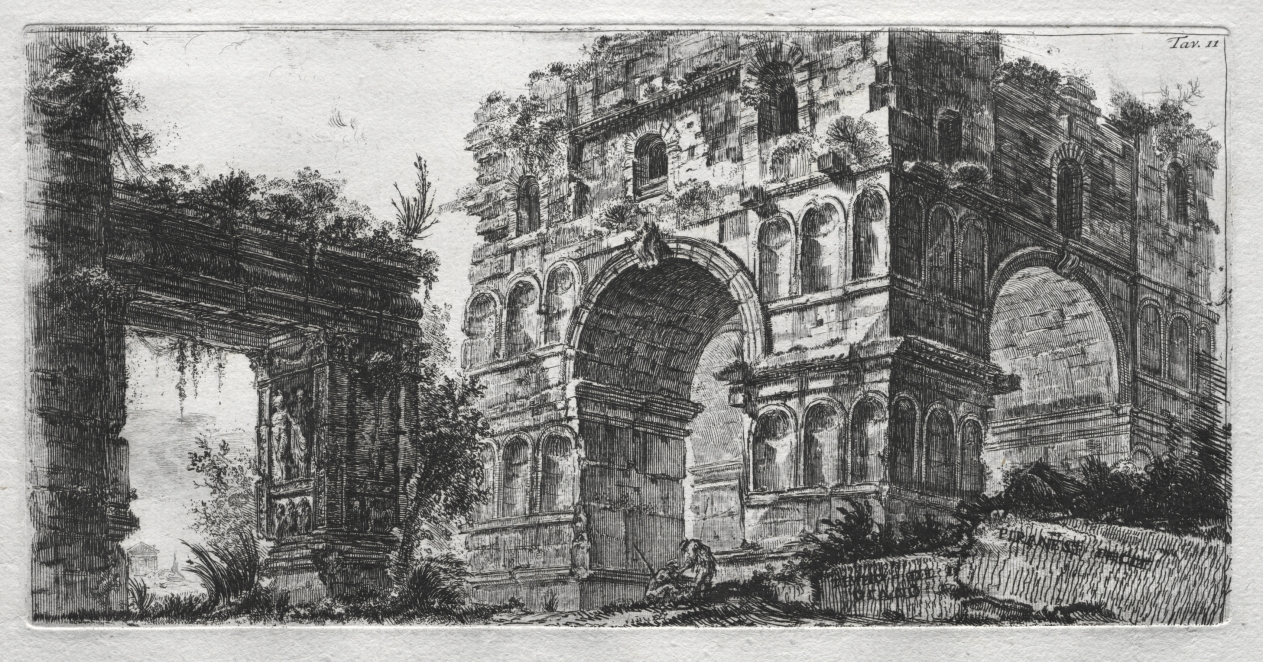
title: Tempio di Diana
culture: Italy, 18th century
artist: Giovanni Battista Piranesi (Italian, 1720–1778)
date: 1748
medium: etching and engraving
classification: Print